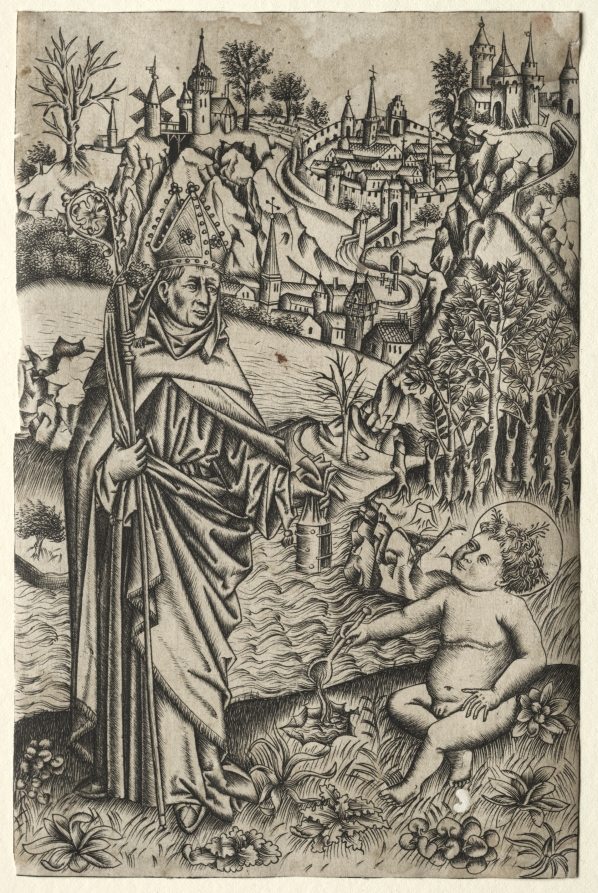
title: St. Augustine and the Child on the Seashore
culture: Germany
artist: Master of the Nuremberg Passion (German, active mid-1400s)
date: c. 1465–1469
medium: engraving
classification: Print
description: The Master of the Nuremberg Passion—named for a set of prints in the Germanisches Nationalmuseum, Nuremberg—was probably a contemporary of the Master E. S. and ranks among the best engravers of his period. He made some 19 engravings, and Saint Augustine and the Child on the Seashore, the most mature of his works, only survives in this unique example. Even the finest lines printed clearly in this early, rich impression.